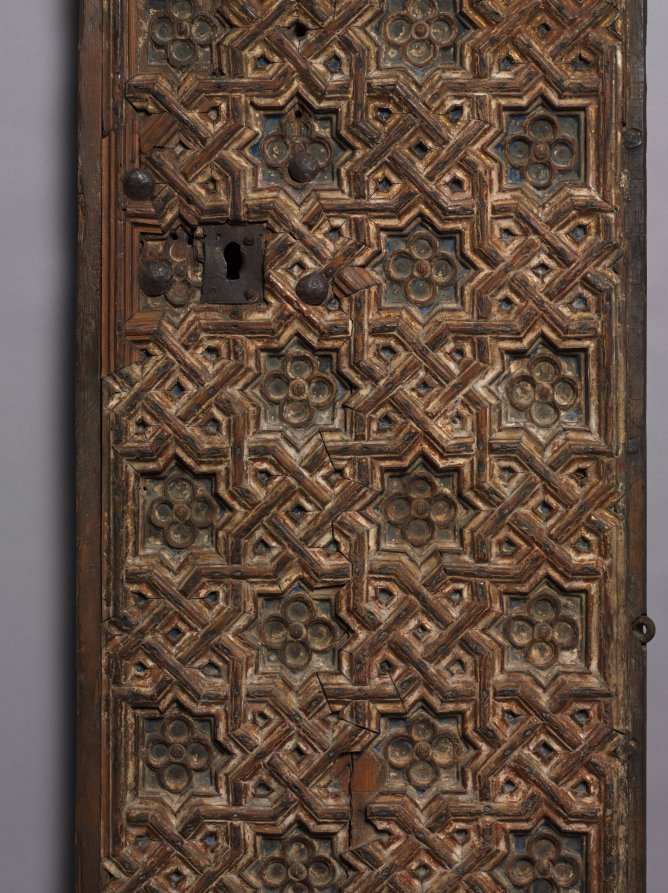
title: Door (right)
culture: Spain, early 15th century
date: early 1400s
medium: gilded and painted wood (pine)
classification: Furniture and woodwork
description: Typical of Muslim-inspired ornamentation, these doors reflect a love of geometric decoration stemming from a nonrealistic artistic tradition. They consist of applied wood strips that form eight-point stars, flowers, and geometric interlace designs. Such designs are reflected in the tiles, ceramic vessels, and metalwork of Muslim-occupied Spain. The origin of the doors is not known, but they may have belonged to a palace or domestic residence. In 711 the Moors had invaded and conquered nearly the entire peninsula. During the next 750 years, independent Muslim states were established, and the entire area of Muslim control became known as Al-Andalus. Muslim philosophers and scientists developed knowledge in areas like medicine, optics, algebra, chemistry, and geometry, as seen here.